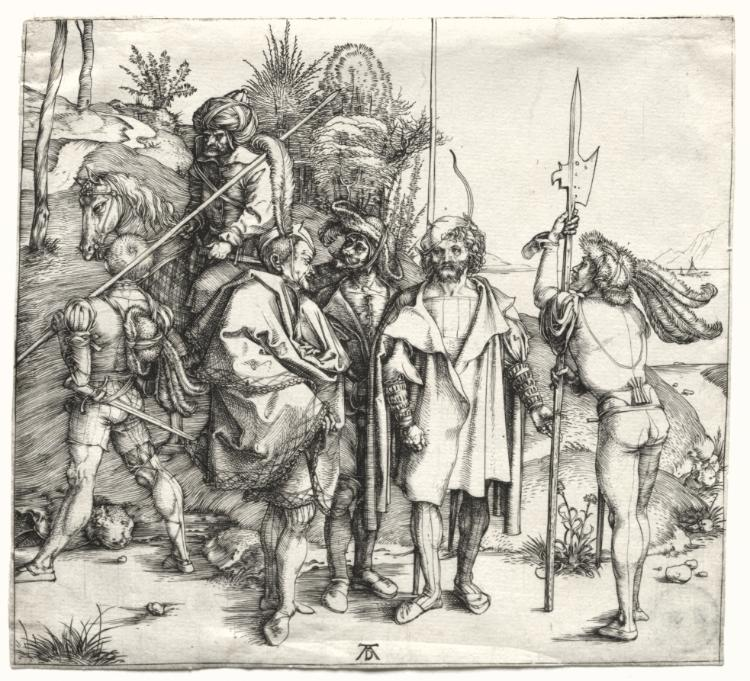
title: Five Soldiers and a Turk on Horseback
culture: Germany, late 15th-early 16th Century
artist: Albrecht Dürer (German, 1471–1528)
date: probably 1496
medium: engraving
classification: Print